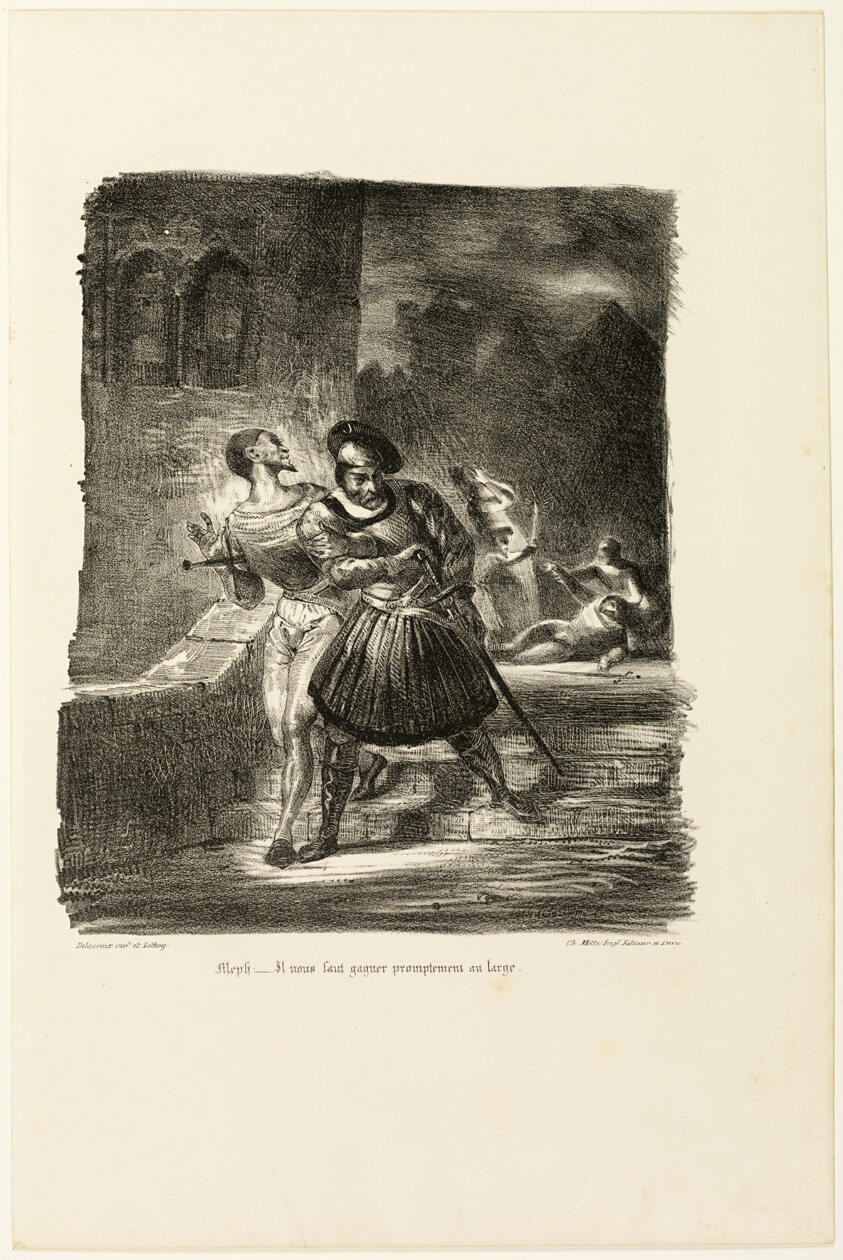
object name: Print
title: Mephistopheles and Faust Fleeing After the Duel, from Faust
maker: Eugène Delacroix (French, 1798-1863)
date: 1828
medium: Lithograph in black on ivory wove paper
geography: France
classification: lithograph; print; prints and drawing